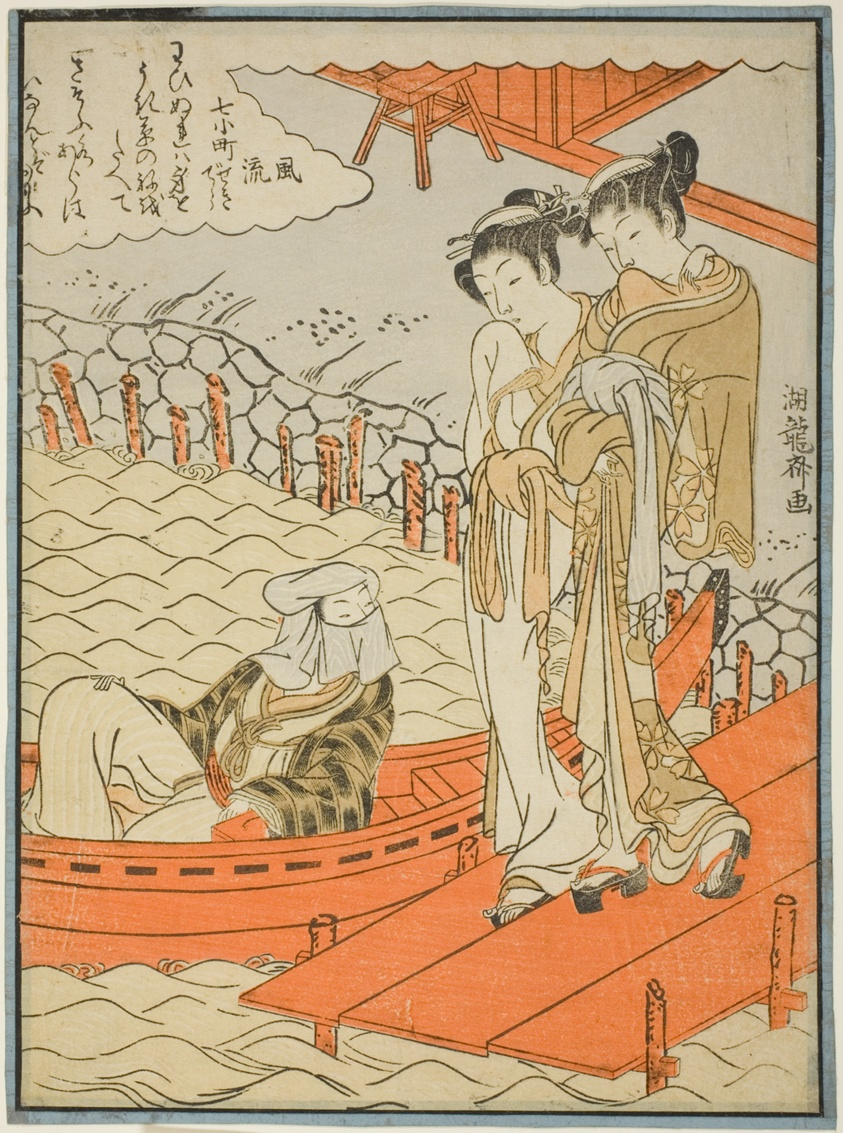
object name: Print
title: Ono no Komachi at Seki Temple, from the series The Seven Fashionable Komachi (Furyu nana Komachi)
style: Japanese (culture or style)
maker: Isoda Koryusai (Japanese, 1735–1790)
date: Edo period (1615–1868), about 1771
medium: Color woodblock print; chuban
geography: Japan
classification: woodblock print; print; asian art